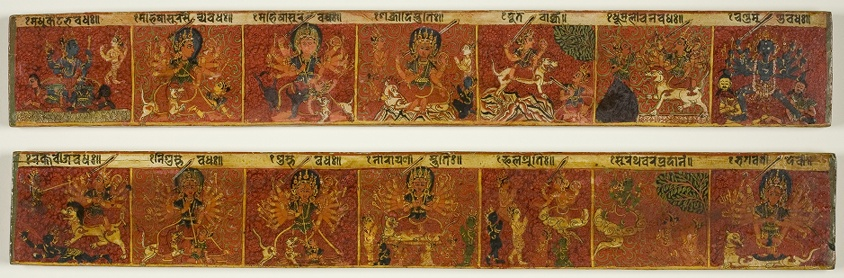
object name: Religious/Ritual Object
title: One of a Pair of Manuscript Covers from the Glorification of the Great Goddess (Devimahatmya)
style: Himalayan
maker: Nepal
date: late 17th century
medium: Pigments and metallic paint on wood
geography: Nepal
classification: ritual objects